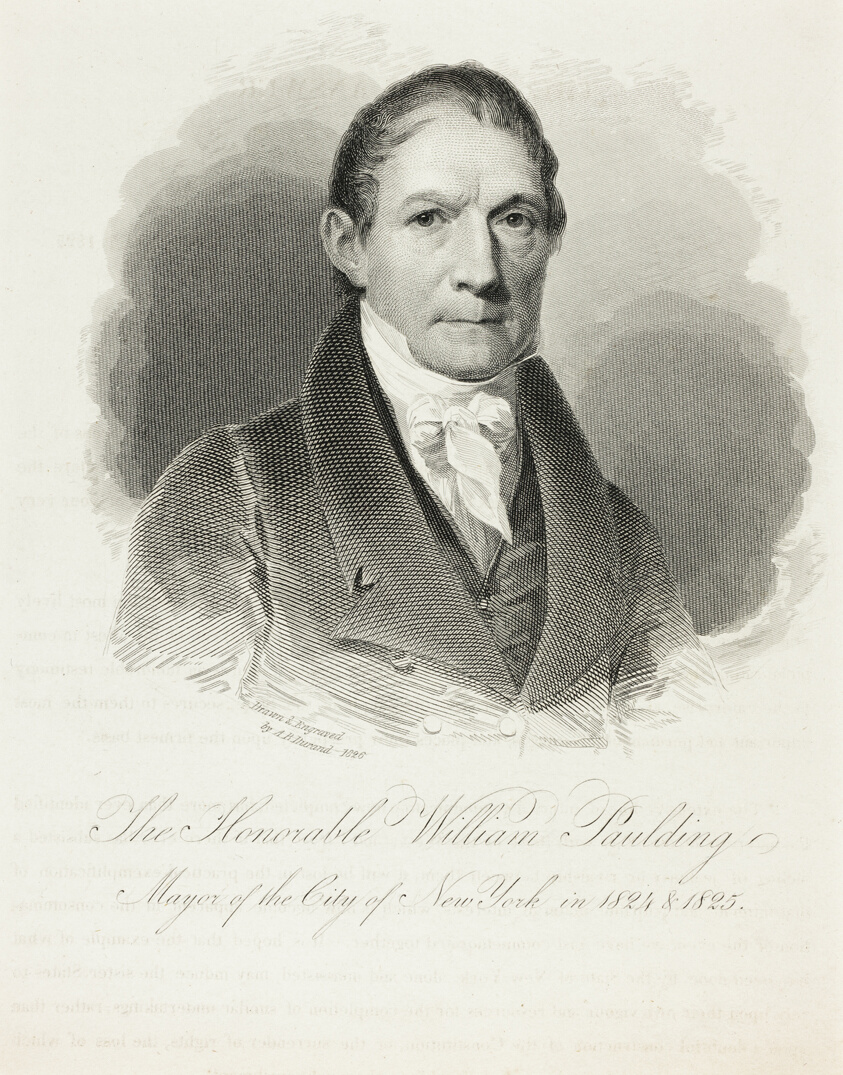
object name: Print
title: The Honourable William Paulding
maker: Asher Brown Durand (American, 1796-1886)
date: 1826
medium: Engraving on ivory wove paper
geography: United States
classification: engraving; print; prints and drawing